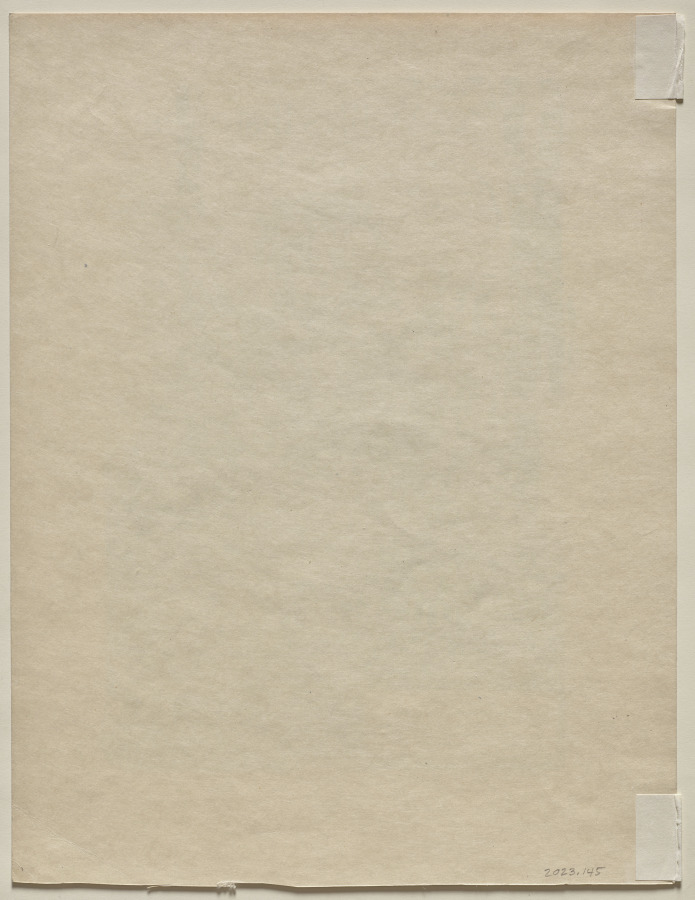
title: Sleepless Night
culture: France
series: Old Tales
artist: Henri de Toulouse-Lautrec (French, 1864–1901)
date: 1893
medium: color lithograph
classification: Print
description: Henri de Toulouse-Lautrec experimented with the recently invented technique of lithography. In addition to fine art prints, he often created ephemera, including posters and sheet music—such as this example. It was commissioned as a cover illustration for Nuit Blanche, a poem by Jean Goudezki that was set to music composed by Désiré Dihau, a well-known bassoonist.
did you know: Désiré Dihau, who composed the music for which Henri de Toulouse-Lautrec created this cover illustration, was the artist’s cousin.